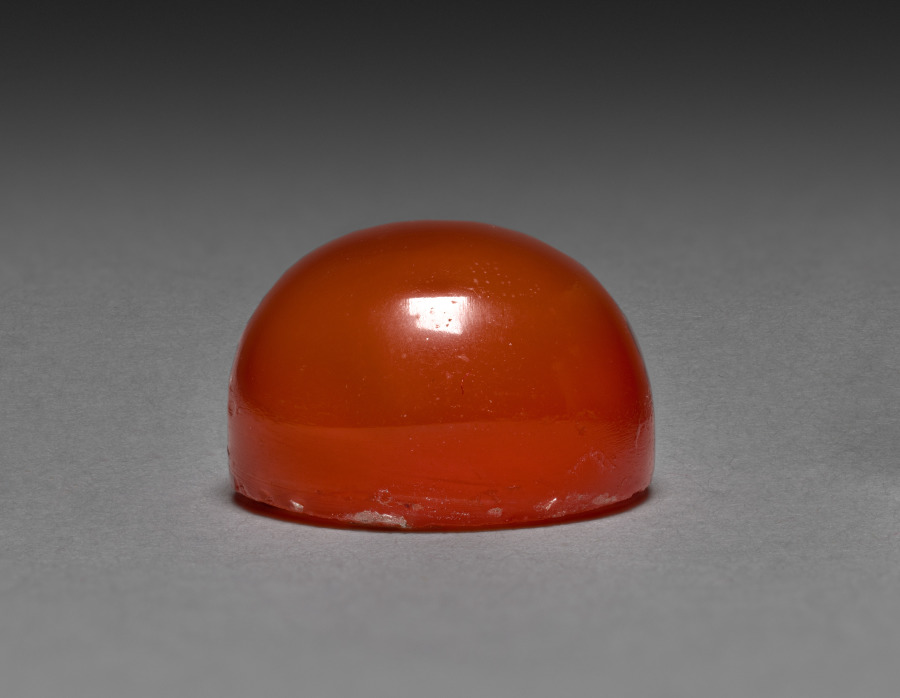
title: Snuff Bottle with Stopper (stopper)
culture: China, Qing dynasty (1644–1911), Qianlong reign (1736–95)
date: 1736–95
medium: jade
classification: Jade